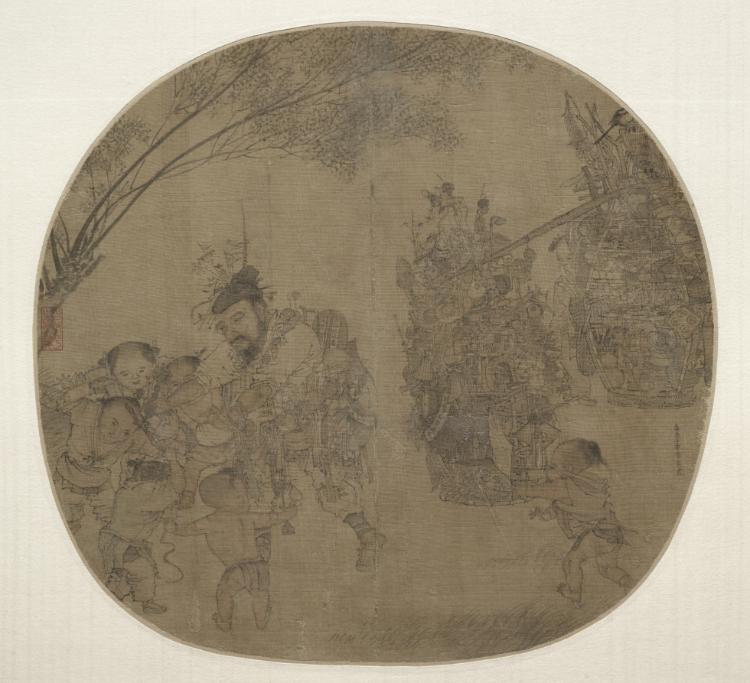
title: The Knickknack Peddler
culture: China, Southern Song dynasty (1127-1279)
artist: Li Song (Chinese, active c. 1190–c. 1230)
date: 1212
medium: Album leaf; ink and color on silk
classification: Painting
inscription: Artist's inscription: 嘉定壬申李嵩畫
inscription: 1 colophon and 4 seals: 1 colophon and 3 seals of Li Zuoxian 李佐賢 [1807–1876]; 1 seal unidentified.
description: The court artist Li Song from Hangzhou excelled in meticulous depictions of children, peddlers, and their various goods. Here, he captures a dramatic scene of children attacking a snake with a stick and stone. The peddler rushes toward the children, leaving his merchandise unattended. Painted during the reign of emperor Ningzong, the drama unfolding around vulnerable children may allude to Ningzong’s nine sons who died young, leaving him without a direct male descendant.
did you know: There is a skull, upside down, near the top of the left basket.